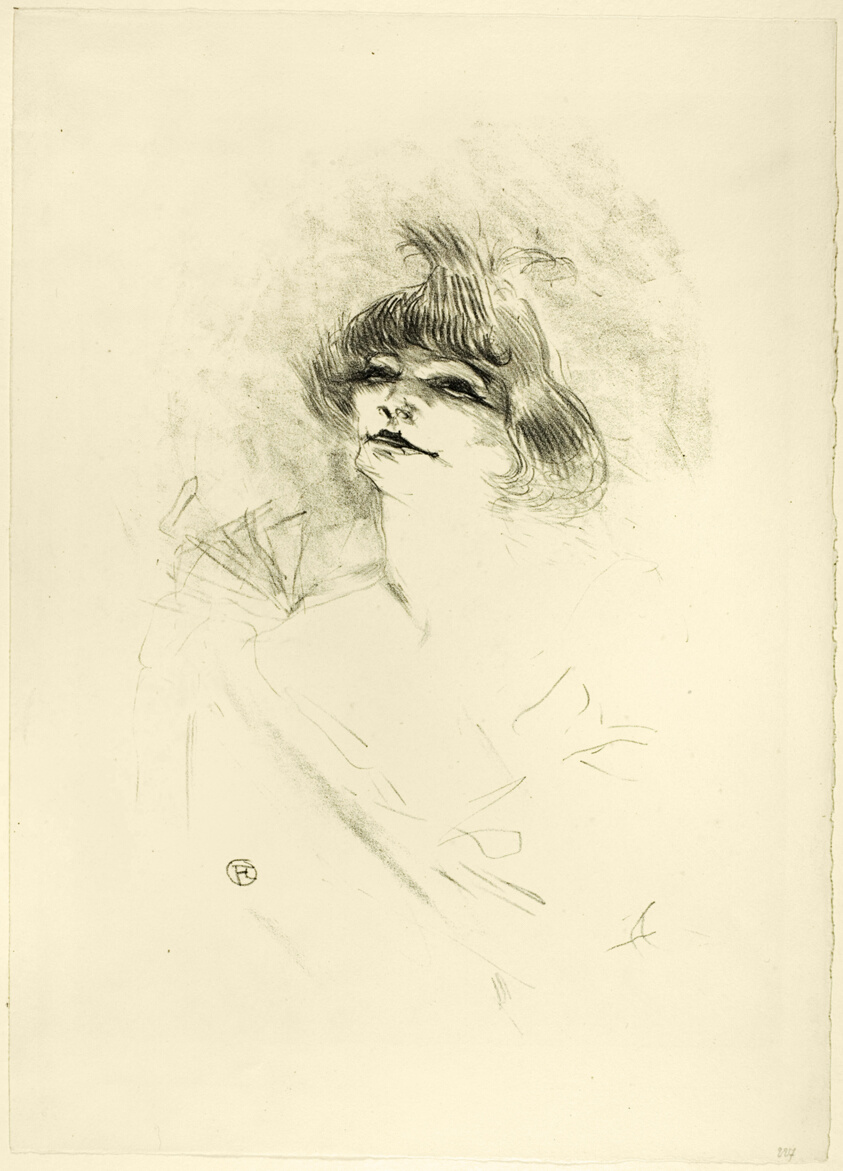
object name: Print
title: Polaire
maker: Henri de Toulouse-Lautrec (French, 1864-1901)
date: 1898, published 1930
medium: Lithograph on cream wove paper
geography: France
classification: lithograph; print; prints and drawing